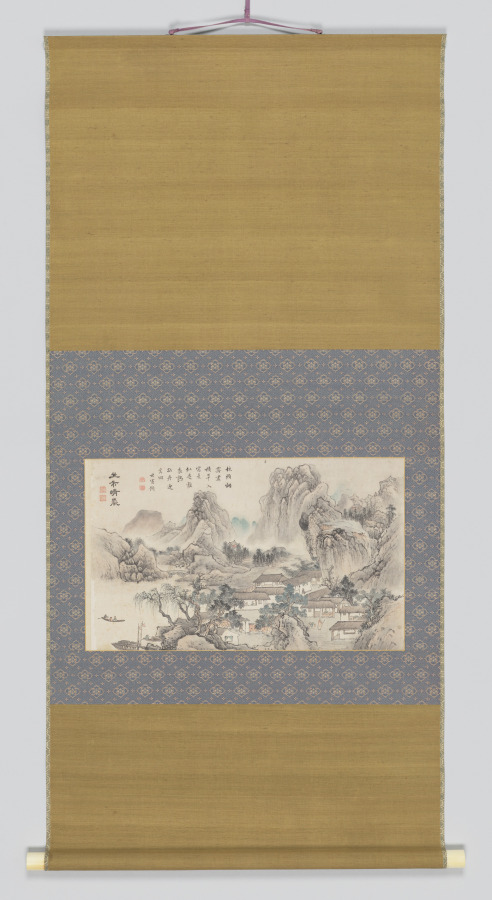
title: Mountain Market in Clearing Mist, from Eight Views of Xiao-Xiang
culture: Japan, Edo period (1615–1868)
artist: Tani Bunchō (Japanese, 1763–1841)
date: 1788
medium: album leaf remounted as a hanging scroll; ink and color on paper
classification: Painting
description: This painting was part of a set of album leaves representing the Eight Views of Xiao-Xiang, a theme originating in Chinese poetry and painting that spread to both Korea and Japan. Southern China’s Xiao-Xiang area, where the mist-covered banks of the Xiang River created a complex landscape shifting like the moods and minds of people, captured the imaginations of generations of painters and calligraphers. Inscriptions on these works suggest that they were possibly ordered by newly prominent Japanese Confucian scholars.